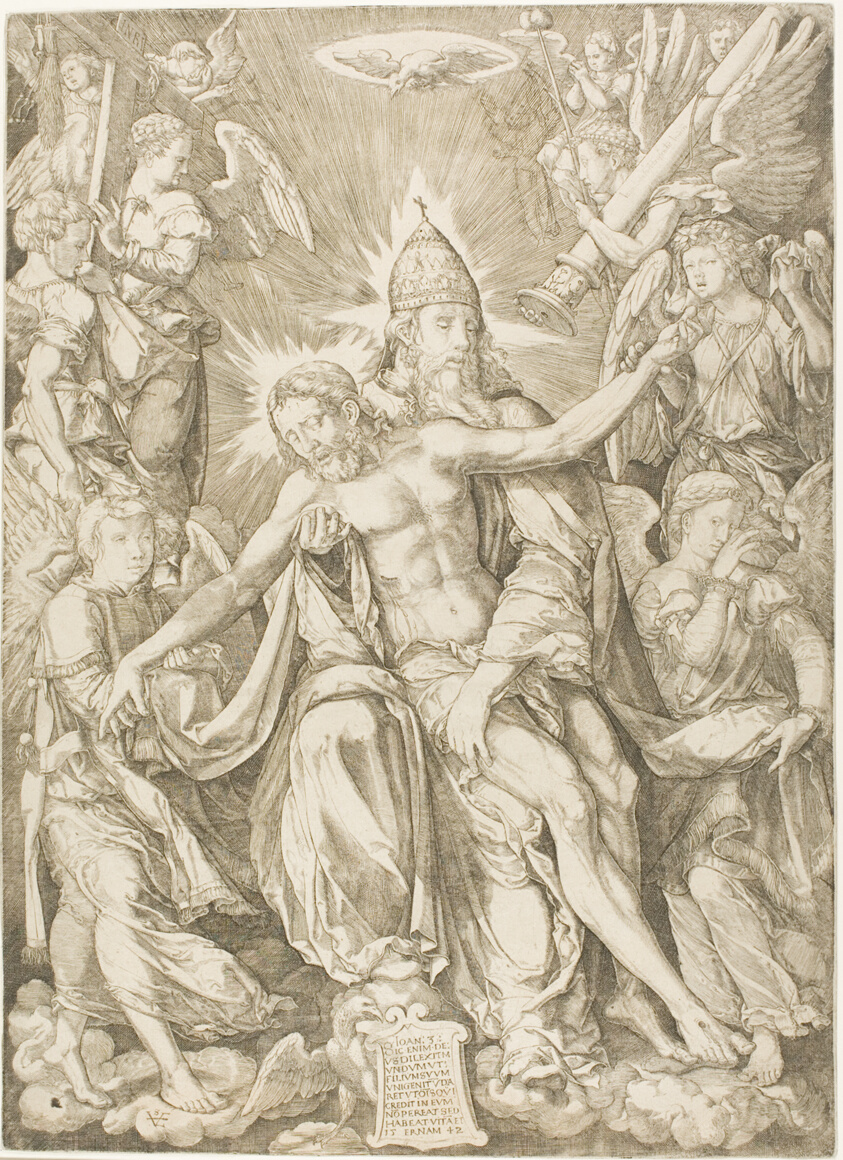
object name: Print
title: The Trinity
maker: Johann Ladenspelder (German, 1512-1561)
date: 1542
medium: Engraving in black on ivory laid paper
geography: Germany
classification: engraving; print; prints and drawing